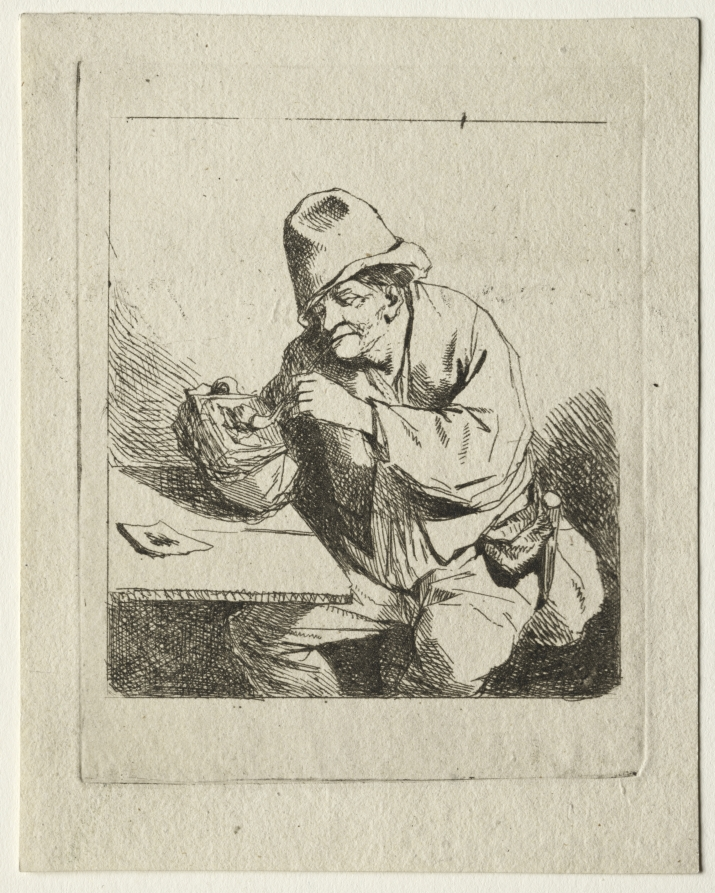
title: Peasant Lighting his Pipe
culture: Netherlands, mid 17th century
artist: Cornelis Pietersz Bega (Dutch, 1631/32–1664)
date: 1620–64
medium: etching with engraving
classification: Print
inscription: VERSO, lower left, in graphite: [P?]68 ; lower left, in graphite: a47178[crossed out] ; lower left, in graphite: 953000 ; lower center, in graphite: B. 20